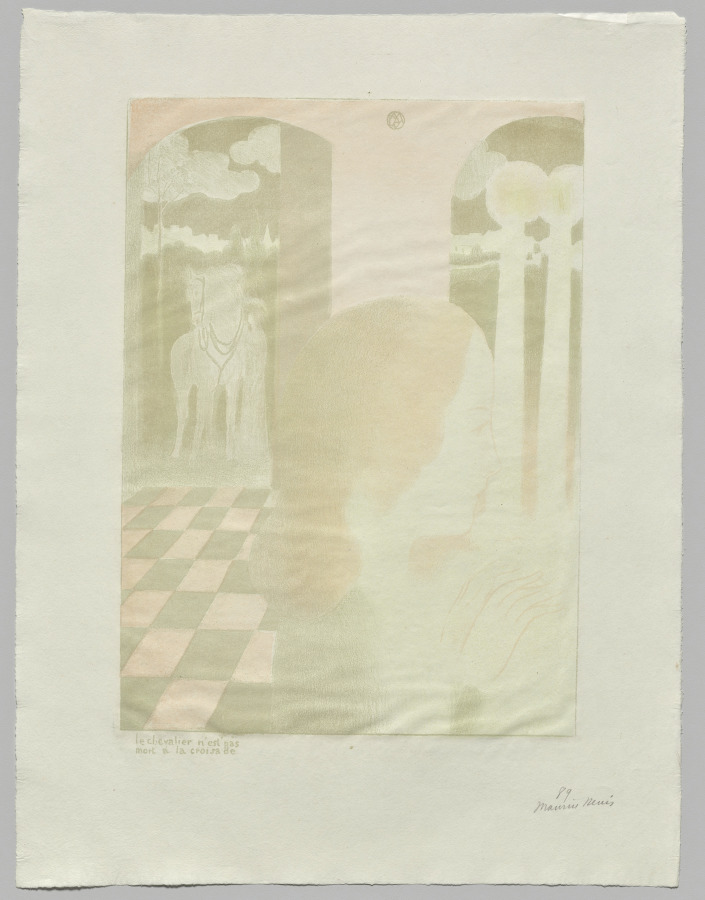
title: The Knight Did Not Die in the Crusade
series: Love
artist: Maurice Denis (French, 1870–1943)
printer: August Clot (French, 1858–1936)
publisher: Ambroise Vollard (French, 1867–1939)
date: 1899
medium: color lithograph on wove paper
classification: Print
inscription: Recto, lower left: “le chevalier n’est pas/mort a la croisade”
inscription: In graphite, recto, lower right: “89/Maurice Denis (signed)”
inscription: Stamp in image, recto, center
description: Maurice Denis belonged to the Nabis, a group of artists who came together in 1889 to pursue a radical new style informed by subjective experience and emotion. This print is from a series in which Denis explored his devotion to his wife, Marthe, by depicting her in a variety of settings alongside titles drawn from his own journal. The vague but evocative images were meant to encourage the viewer to draw connections to the theme and meditate on its meaning.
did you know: Maurice Denis was a devout Catholic and often drew visual connections between his wife, Marthe, the subject of this print series, and the Virgin Mary.